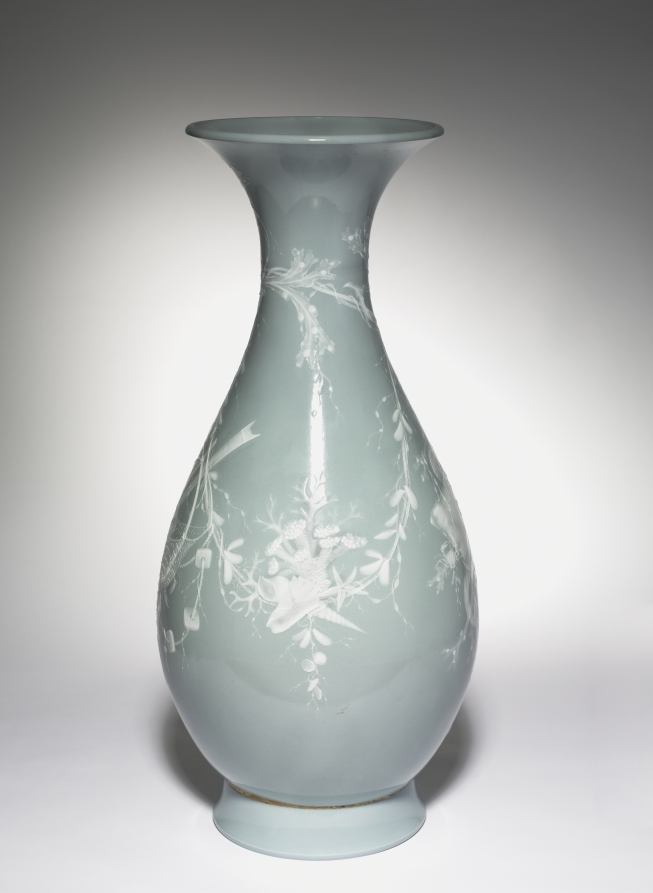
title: Vase Bertin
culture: France, 19th century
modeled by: Jules-Constant Peyre (French, 1811–1870?)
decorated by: Léopold Jules Gély (French)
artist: Sèvres Porcelain Factory (French, est. 1756)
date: c. 1855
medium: porcelain with pâte-sur-pâte decoration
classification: Ceramic